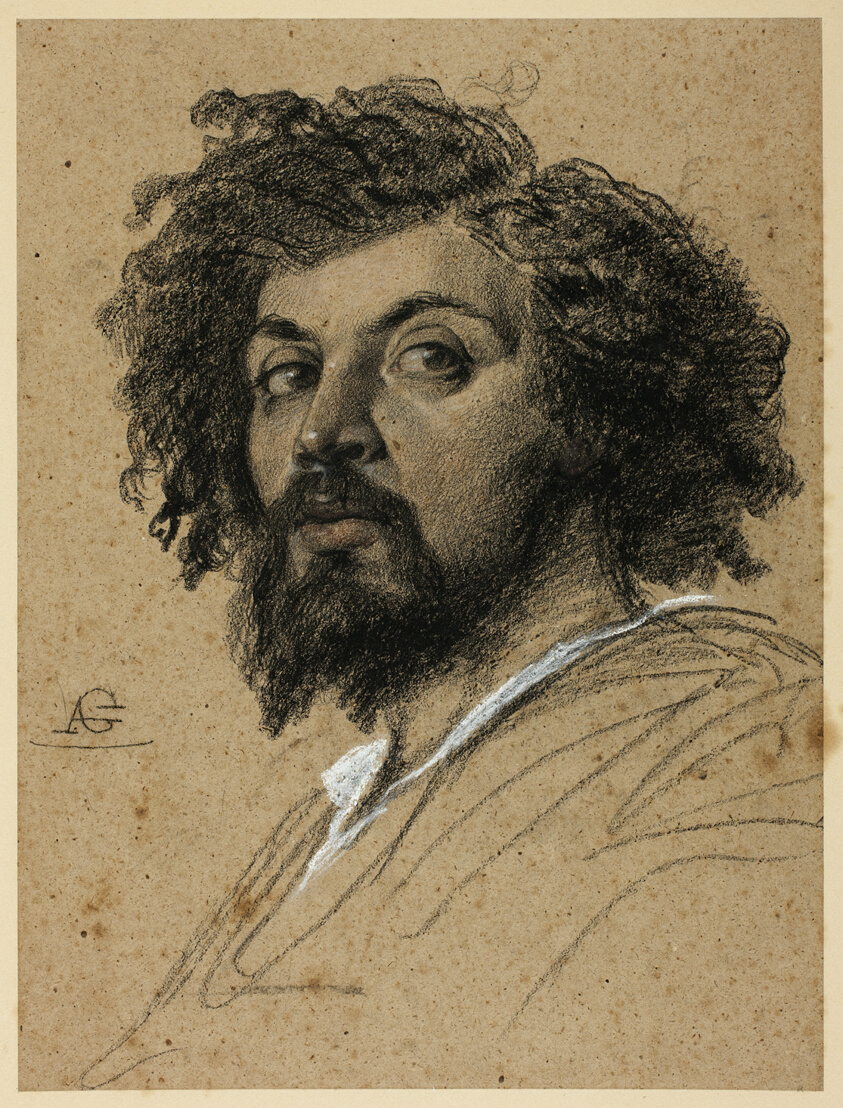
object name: Drawing and Watercolor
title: Self-Portrait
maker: Auguste Barthélémy Glaize (French, 1807-1893)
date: c. 1830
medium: Black Conté crayon, heightened with red-brown wash and white Conté crayon on dark tan wove paper, laid down on tan wove paper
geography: France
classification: conté crayon; drawings (visual works); prints and drawing